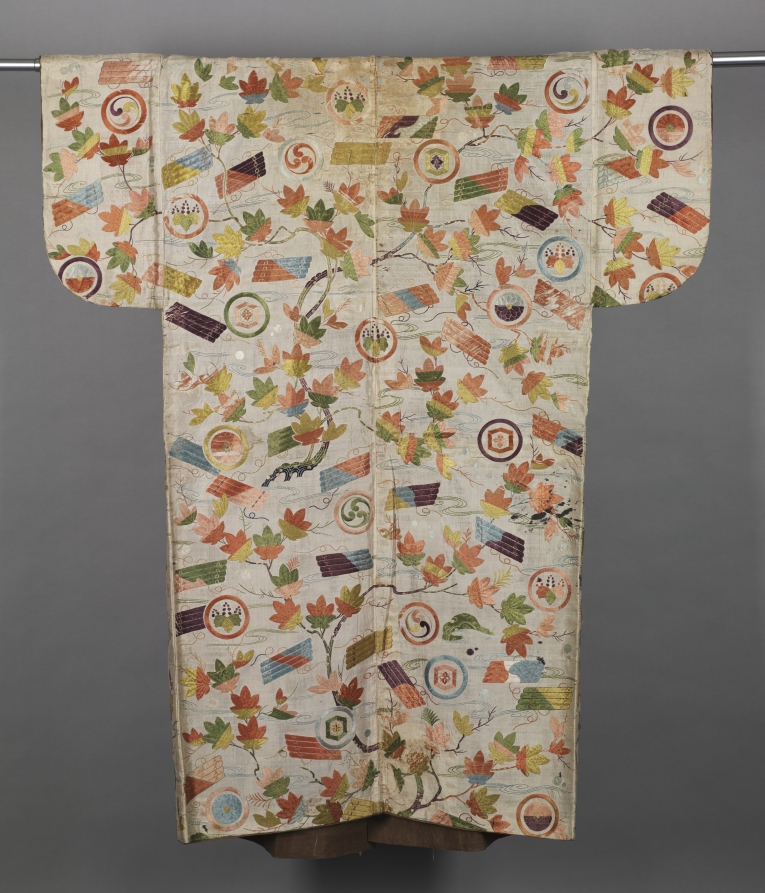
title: Noh Robe (Karaori)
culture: Japan, Momoyama period (1573–1615)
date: c. 1600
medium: embroidered silk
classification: Garment